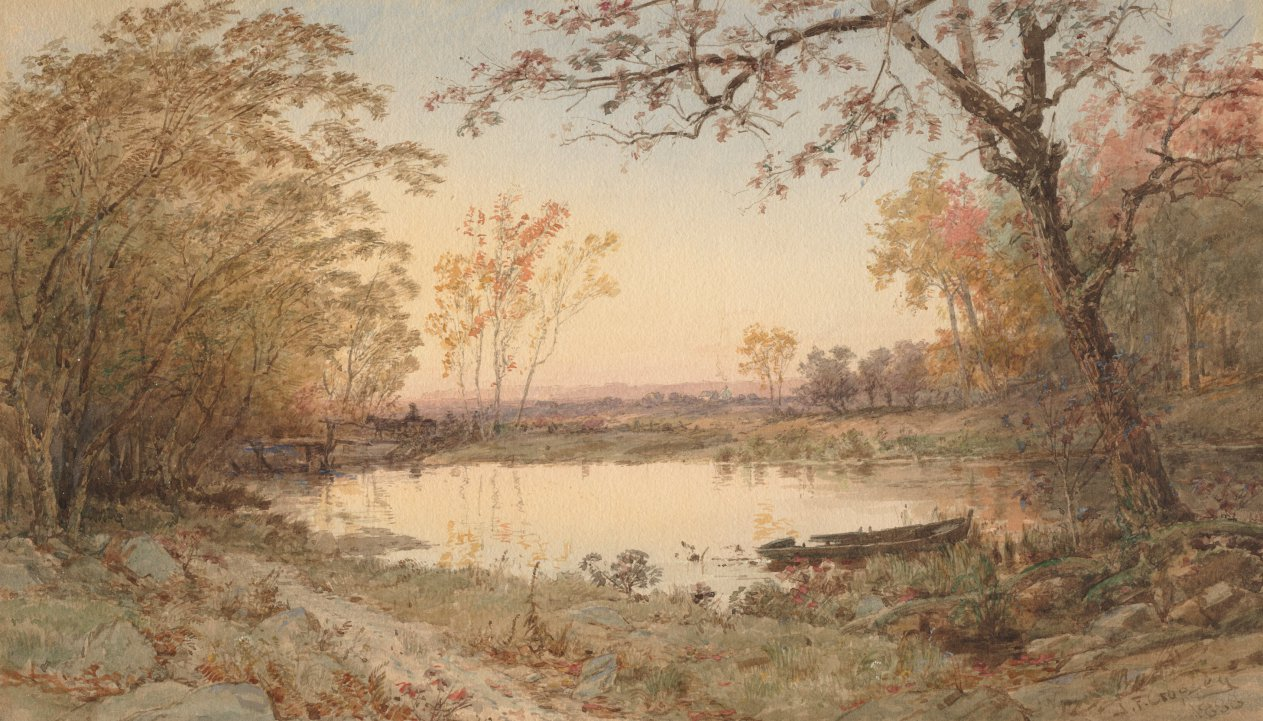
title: Landscape (Hastings-on-Hudson)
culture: America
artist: Jasper F. Cropsey (American, 1823–1900)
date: 1888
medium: watercolor over graphite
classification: Drawing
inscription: lower right, in watercolor: J.F. Cropsey/1888